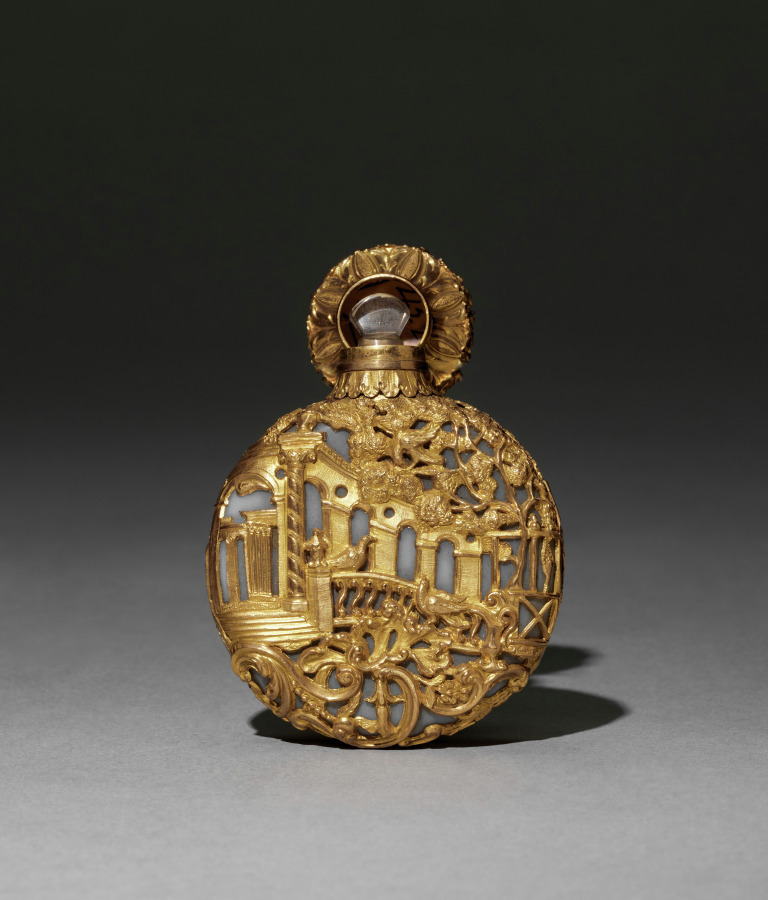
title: Scent Bottle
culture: Germany (?)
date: 1800s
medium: blue-gray opaline glass mounted in gold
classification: Miscellaneous